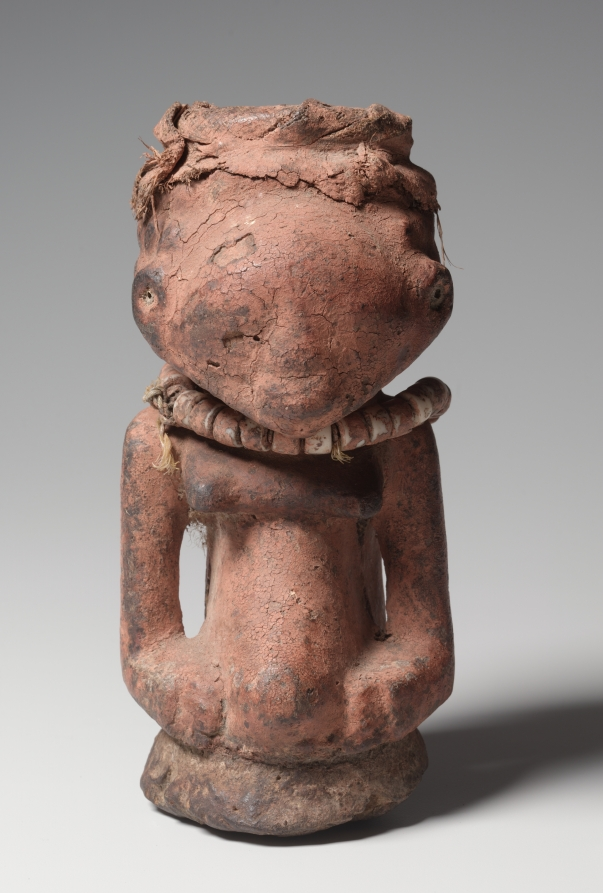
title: Figure (Nkishi)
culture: Africa, Central Africa, Democratic Republic of Congo, Luba-style maker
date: late 1800s–early 1900s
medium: Wood, organic materials (including resin and soil), plant fiber, and glass beads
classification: Sculpture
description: The substances contained in its cloth-covered cranial cavity indicate that this half-figure belongs to the broad category of charms or “power objects” that the Luba call mankishi. It was used by a ritual expert and functioned in a variety of rituals dealing with healing, protection, divination, or jurisdiction. Often such power figures were carved by the ritual experts rather than by professional artists.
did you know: Unlike most Luba arts, this figure is not connected to the royal court.